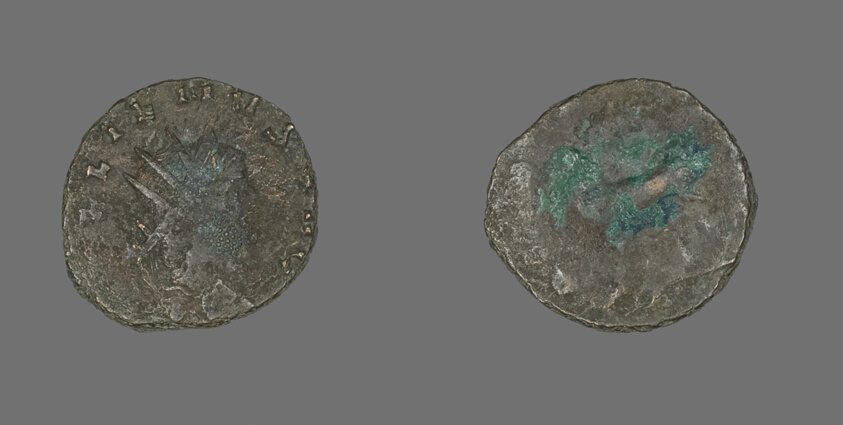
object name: Coin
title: Antoninianus (Coin) Portraying Emperor Gallienus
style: roman (ancient, style or period), ancient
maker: Roman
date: 260-268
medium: Billon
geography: Roman Empire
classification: coin; ancient art